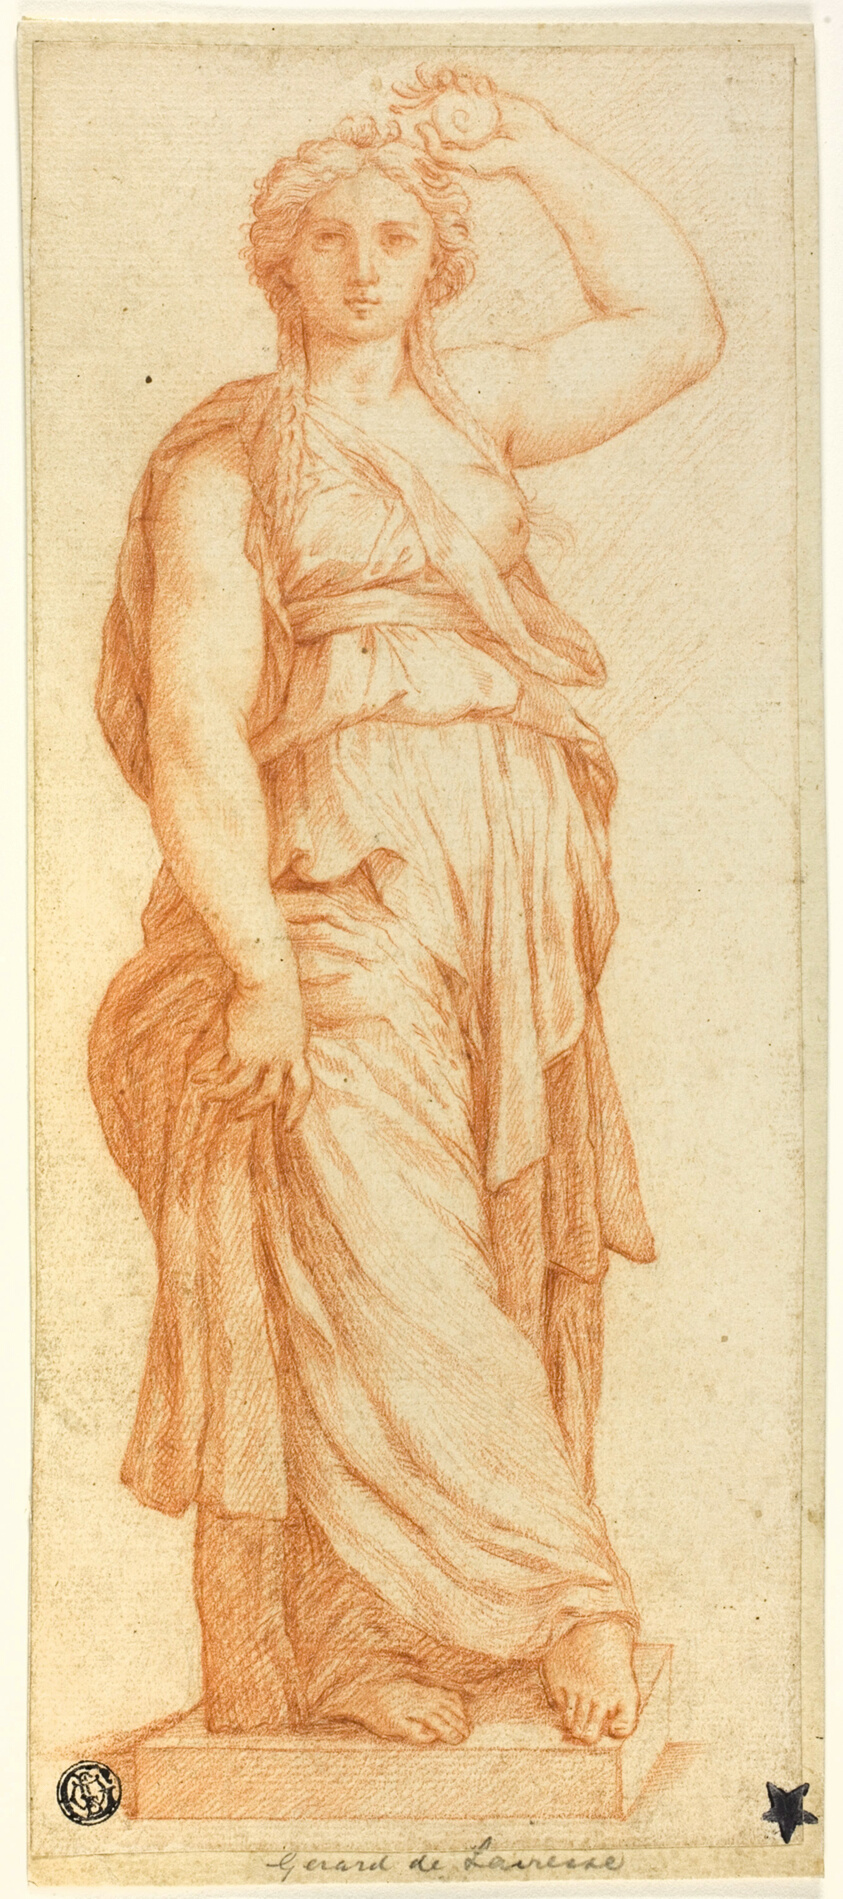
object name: Drawing and Watercolor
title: Female Caryatid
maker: After Pietro Buonaccorsi, called Perino del Vaga; Italian, 1501-1547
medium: Red chalk on ivory laid paper, laid down on card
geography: Italy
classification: chalk; drawings (visual works); prints and drawing